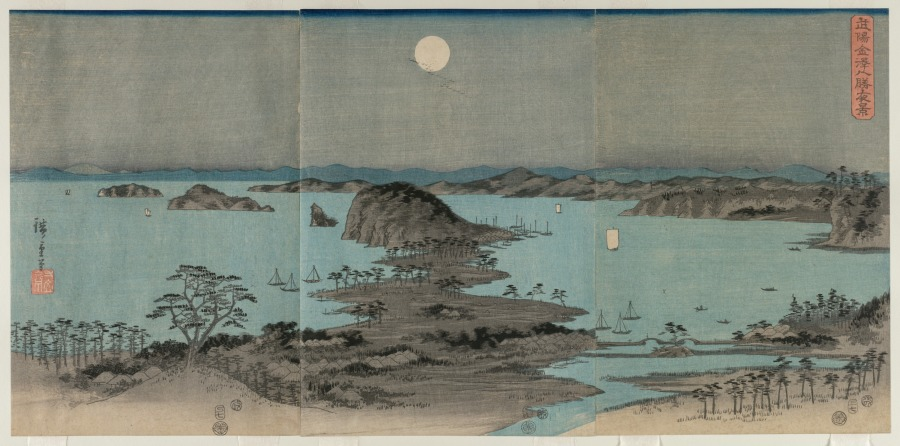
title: Eight Views of Kanazawa at Night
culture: Japan, Edo period (1615–1868)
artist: Utagawa Hiroshige (Japanese, 1797–1858)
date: 1857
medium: Triptych of color woodblock prints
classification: Print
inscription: Signature: Hiroshige hitsu Publisher: Okazawaya Taheiji (emblem) Censorship Seal: aratame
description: Late in his career, Hiroshige explored the poetic theme of setsugekka, “snow, moon, and flowers,” in a set of three triptychs. This panoramic scene shows the autumn moon over Kanazawa, near Tokyo. Hiroshige’s contemporaries would have recognized the coastline dotted with villages, fishing boats, and the distinctive double-arched bridge at the bottom right.